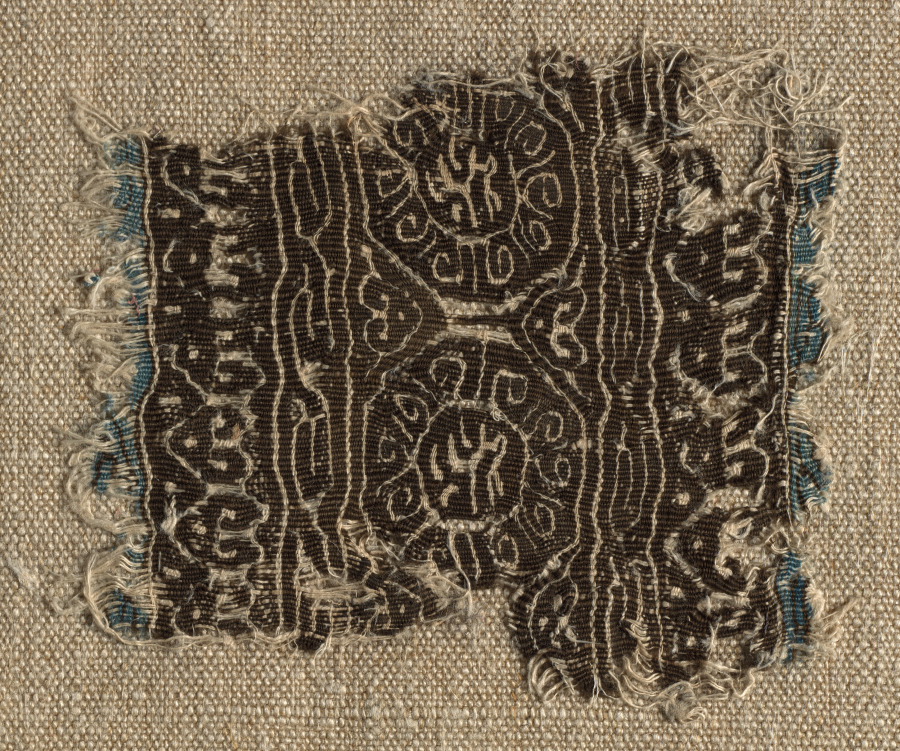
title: Fragment of a Tiraz-Style Textile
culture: Egypt, Fatimid period, Caliphate of al-Hafiz, AH 524-544, 12th Century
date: 1130 – 1149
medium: tapestry (originally inwoven in a tabby ground); linen and silk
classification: Textile